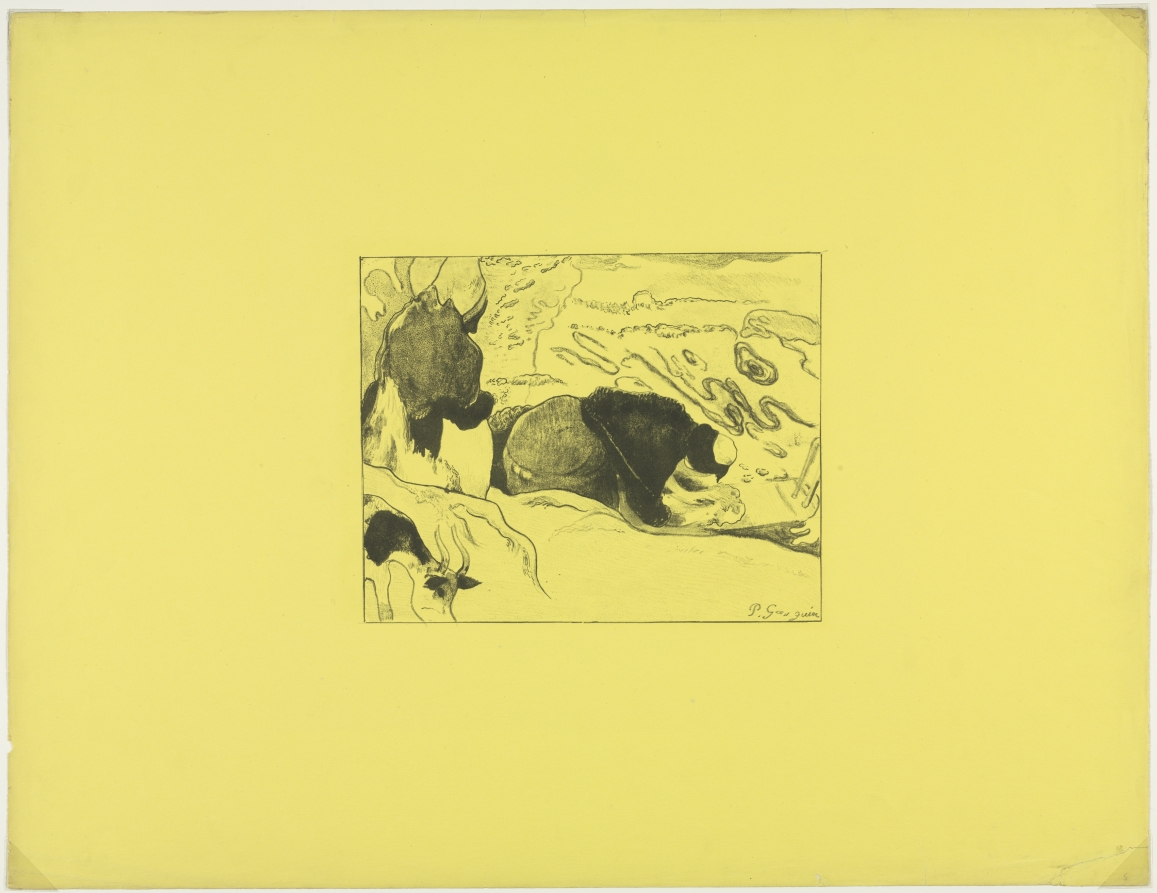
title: Volpini Suite: Laundresses (Les Laveuses)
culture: France, 19th century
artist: Paul Gauguin (French, 1848–1903)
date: 1889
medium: zincograph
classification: Print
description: Gauguin discovered an exotic, primitive culture in Brittany, a rugged region on the Atlantic coast in northwestern France. He then sought to translate into expressive forms the picturesque costumes, customs, and special spirituality of the peasants. The unusual point of view, the stylization of the frothing water, and the cropped cow at the lower left all betray the influence of Japanese woodblock prints, which became popular in France from the early 1860s. The twelve lithographs in this set, printed from zinc plates rather than stones, were Gauguin's first attempts at printmaking. To heighten the decorative effect, the lithographs were printed onto large sheets of bright yellow paper.